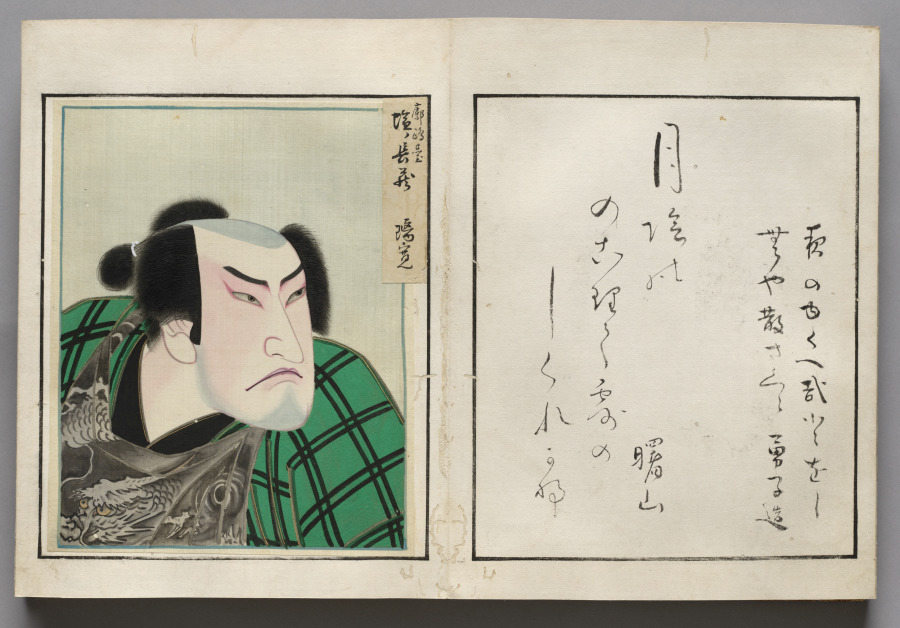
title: Double-Leaf from Album of Actor Portraits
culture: Japan, Edo period (1615–1868)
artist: Shōrakusai (Japanese)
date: c. 1790–1810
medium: double-leaf from an accordion-style album; ink on paper (right) and ink and color on silk (left)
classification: Bound Volume